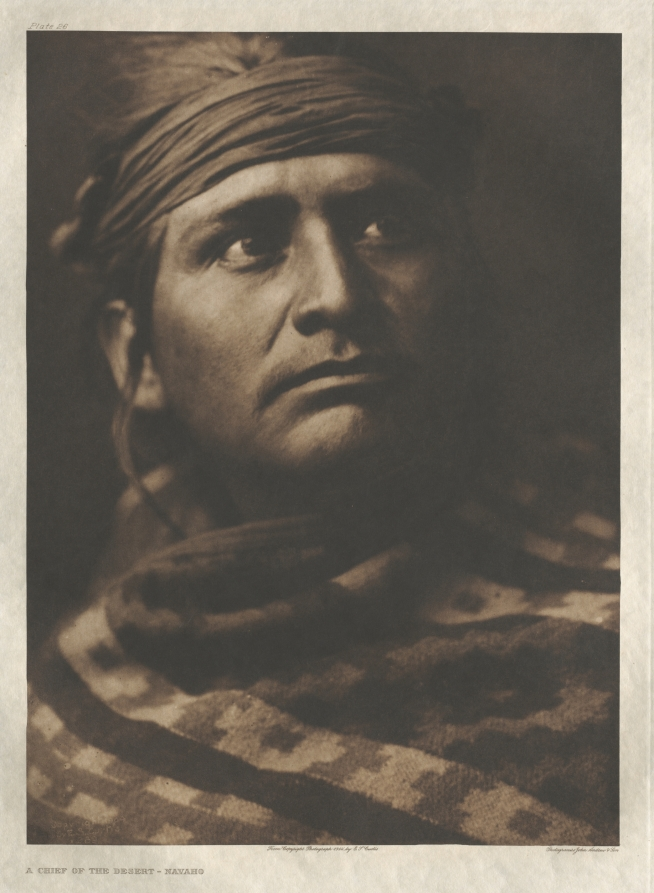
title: Portfolio I, Plate 26: A Chief of the Desert-Navaho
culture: America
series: The North American Indian: being a series of Portfolios picturing and describing the Indians of the United States, the Dominion of Canada, and Alaska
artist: Edward S. Curtis (American, 1868–1952)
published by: The University Press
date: 1904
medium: photogravure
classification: Portfolio